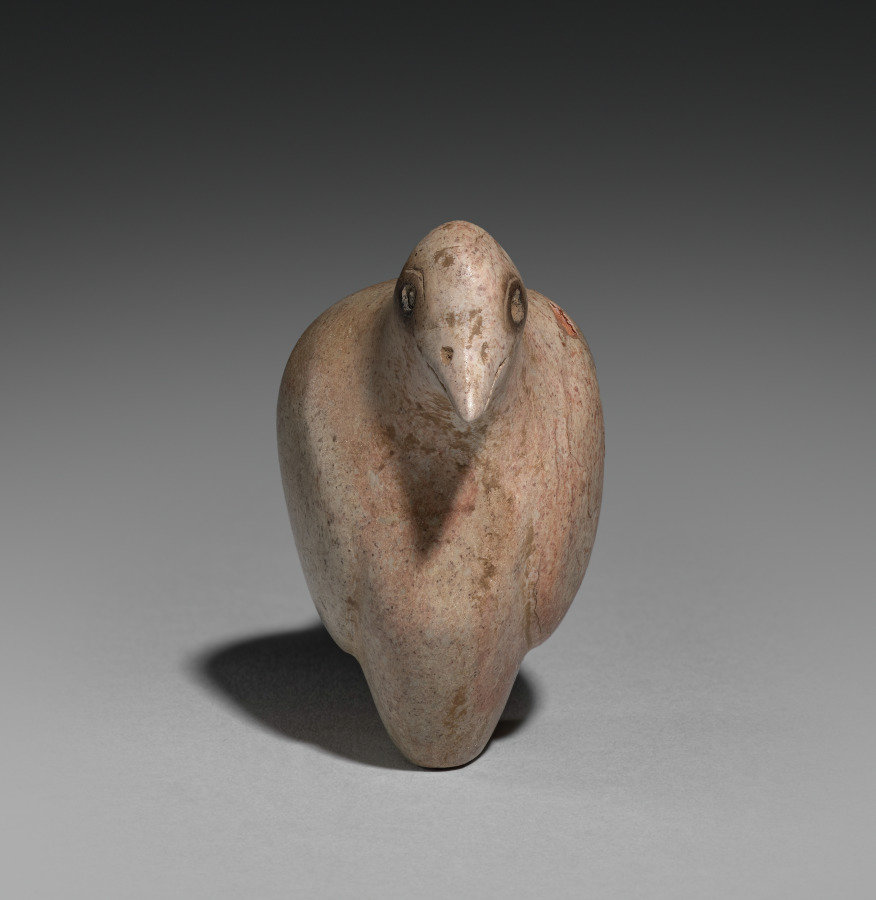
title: Nesting Quail Stamp Seal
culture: Iran, Lake Van region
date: 4000–3000 BCE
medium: dickite stone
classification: Sculpture